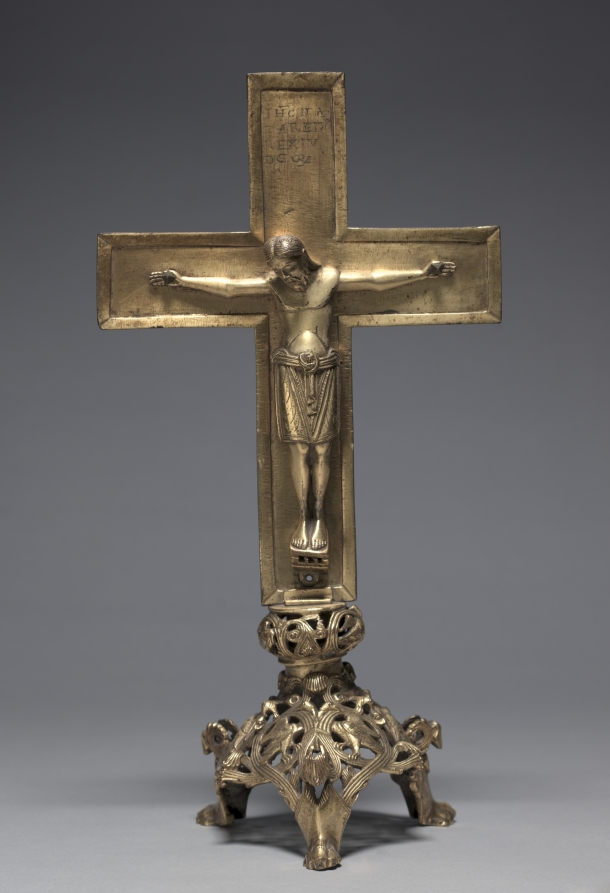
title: Altar Cross with Stand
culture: Germany, Lower Saxony, Hildesheim?, Romanesque period, 12th century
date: 1140–1150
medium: bronze: cast, gilded, engraved, and chased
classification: Metalwork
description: From the 11th century onward, altar crosses like this one often featured elaborate bases. The most impressive decoration of this cross is its stand: a lavish array of intertwining scrolls emerges from three pawlike legs, while birds perch amid the scrolls and dragon heads sprout from others.